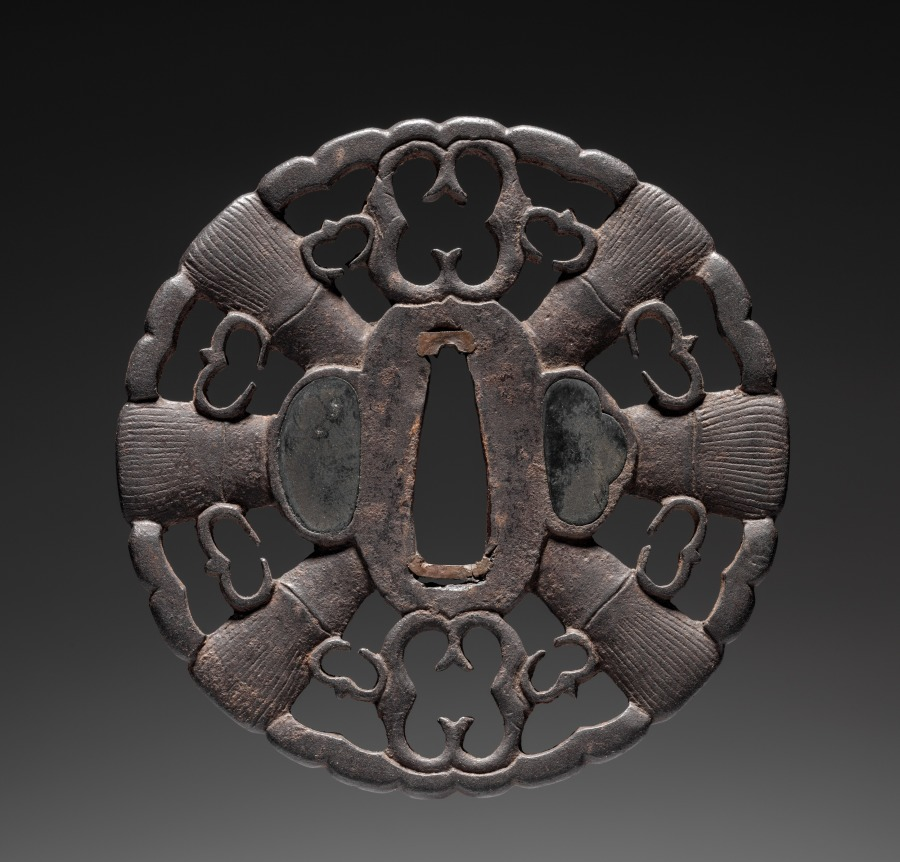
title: Sword Guard (Tsuba)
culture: Japan, possibly Edo period (1615-1868)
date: c. 1615–1868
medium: iron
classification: Arms and Armor